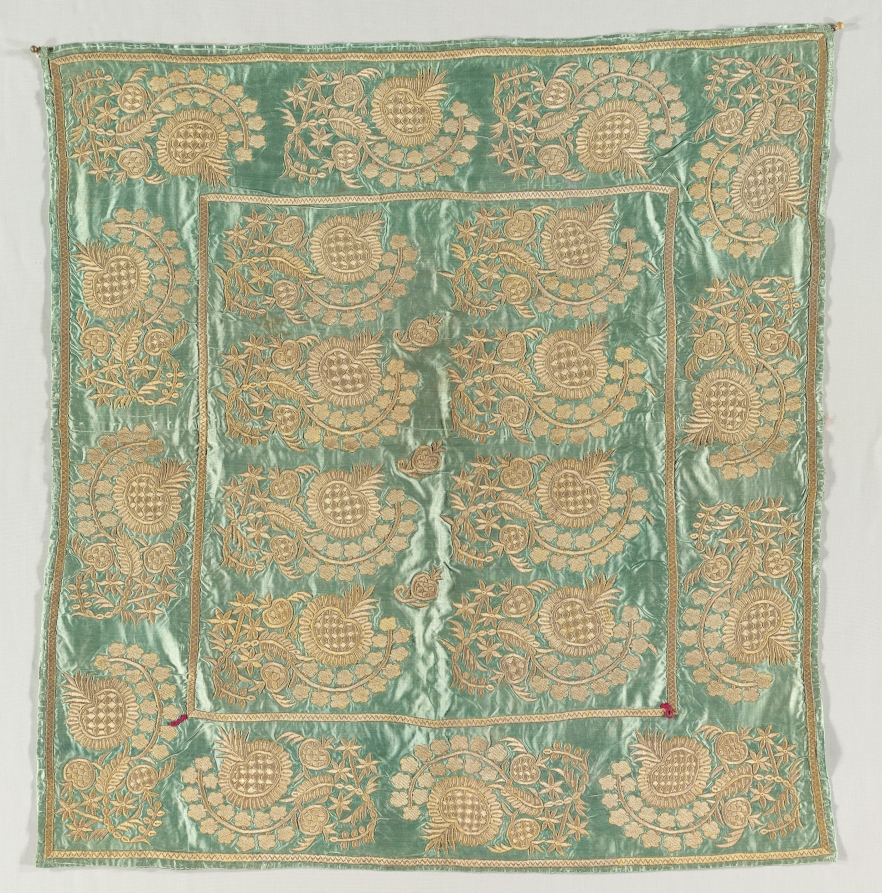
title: Embroidered envelope with closures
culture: Turkey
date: late 1700s to early 1800s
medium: satin weave: silk; embroidery, couched stitches: gilt-metal thread and cotton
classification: Embroidery